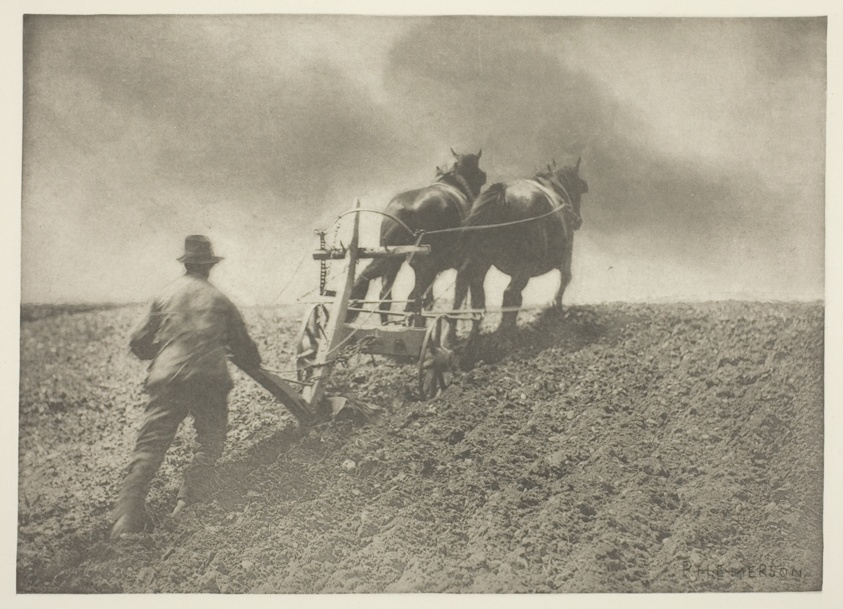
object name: Photograph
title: A Stiff Pull, (Suffolk)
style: 19th century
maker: Peter Henry Emerson (English, born Cuba, 1856–1936)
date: c. 1883/87, printed 1888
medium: Photogravure, plate IV from "Pictures of East Anglian Life," published by Sampson Low, Marston, Searle & Rivington (1888)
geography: England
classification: photogravure; photomechanical process; photography; photograph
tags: Collected by Hugh Edwards, Pictures of East Anglian Life, Seat of War in the Crimea